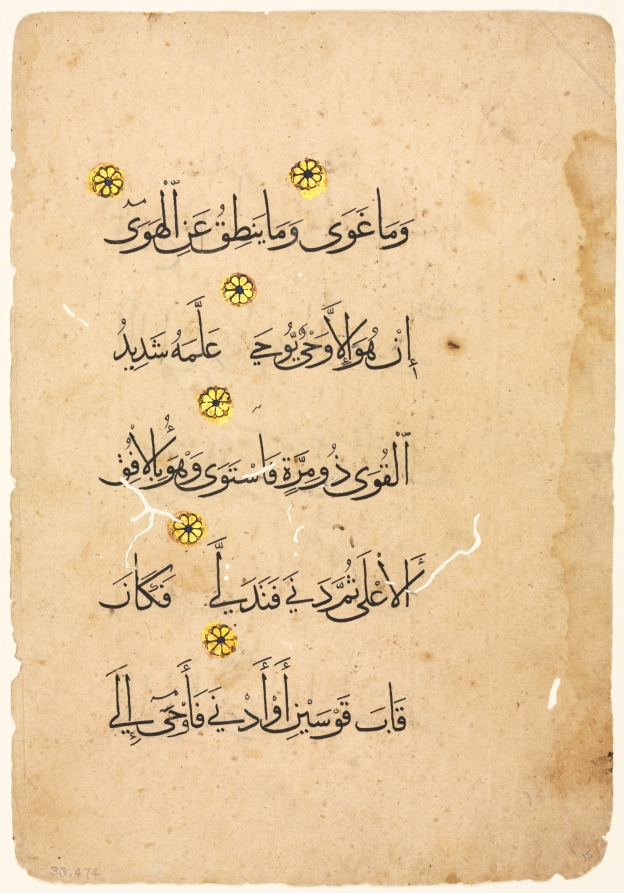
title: Qur'an Manuscript Folio (verso)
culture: Egypt, Mamluk sultanate (1250–1517)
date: 1300s–1400s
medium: ink, gold, and colors on paper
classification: Drawing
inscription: Sura al-Najm [Chapter:The Stars] 53; part 2-part 10 (Arabic) Script: Muhaqqaq (five lines to a page)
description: It is through the Arabic language that the Qur’an was revealed to the Prophet Muhammad in the 600s. As a result, calligraphy is celebrated as the highest form in Islamic art. The verses (ayat) written here come from the 53rd chapter (surah) of the Qur’an, also known as the Surah An-Najm, the Chapter of the Star. The significance of the Qur’an provides an explanation for the importance of calligraphy, but its use was not restricted to religious texts. Many objects in the museum's Islamic collection bear calligraphic inscriptions and come from secular contexts, displaying the versatility and creativity of this art form.